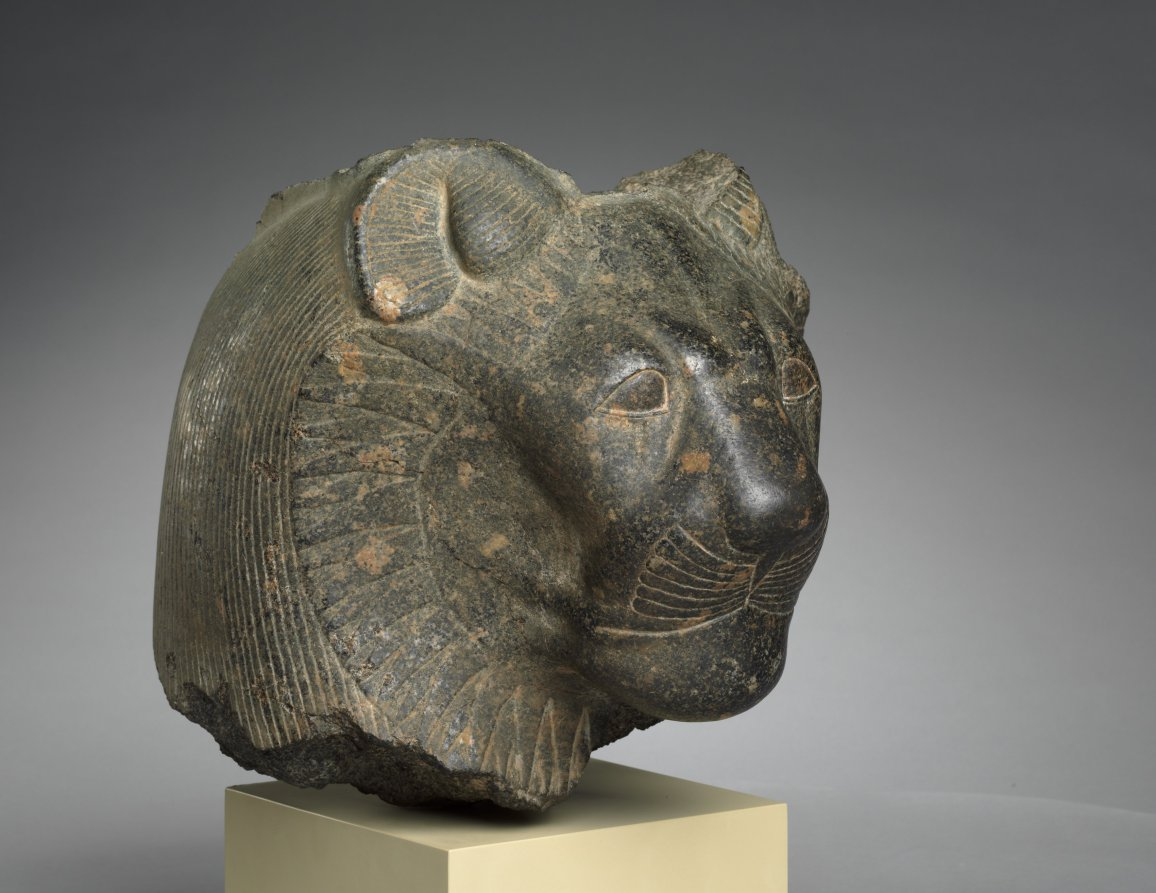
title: Head of Sekhmet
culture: Egypt, Thebes(?), New Kingdom (1540–1069 BCE), Dynasty 18, reign of Amenhotep III (1390–1352 BCE)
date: c. 1391–1353 BCE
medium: granodiorite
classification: Sculpture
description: This lioness head once belonged to a grand statue of the goddess Sekhmet, "the powerful one," probably seated and wearing a tight dress. Possibly appealing to her healing aspect, Pharaoh Amenhotep III, often described as “beloved of Sekhmet,” commissioned and dedicated hundreds of large granodiorite Sekhmet sculptures in his Theban mortuary temple. Thus, this head likely comes from Thebes, perhaps later moved across the Nile—like many such sculptures—to the temple of Mut, a related deity, at Karnak. Behind her stylized ruff, Sekhmet wears a wig, once crowned with a sun disk and uraeus, the stylized cobra symbolizing royal or divine power.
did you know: Amenhotep III may have dedicated 730 statues of Sekhmet, two for each day of the year.